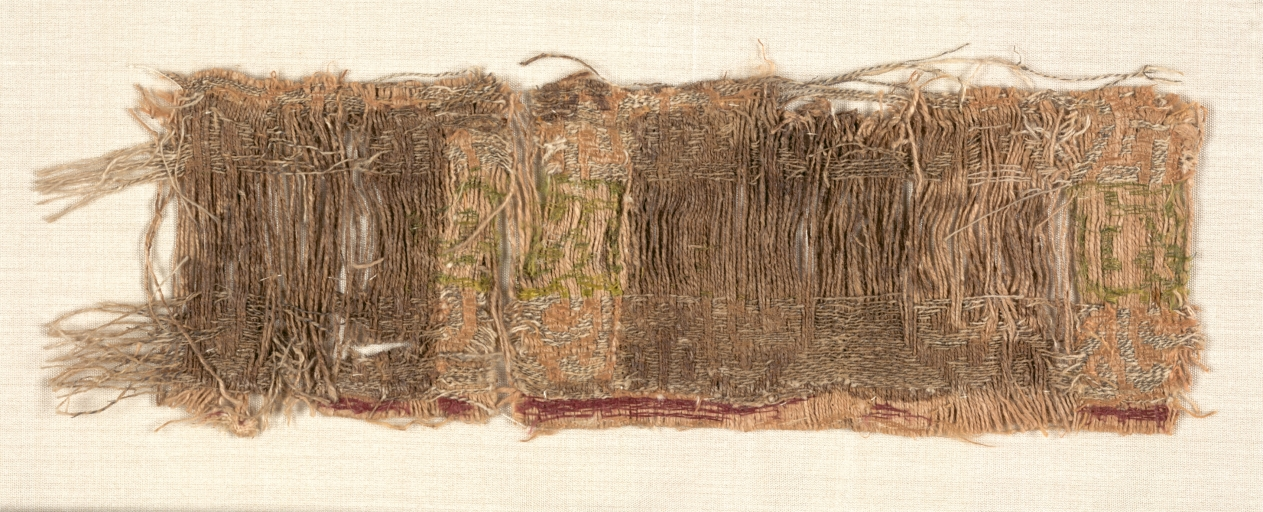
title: Textile Fragment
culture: Spain, Mudejar, 13th century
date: 13th century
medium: compound twill: silk, gold and linen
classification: Textile